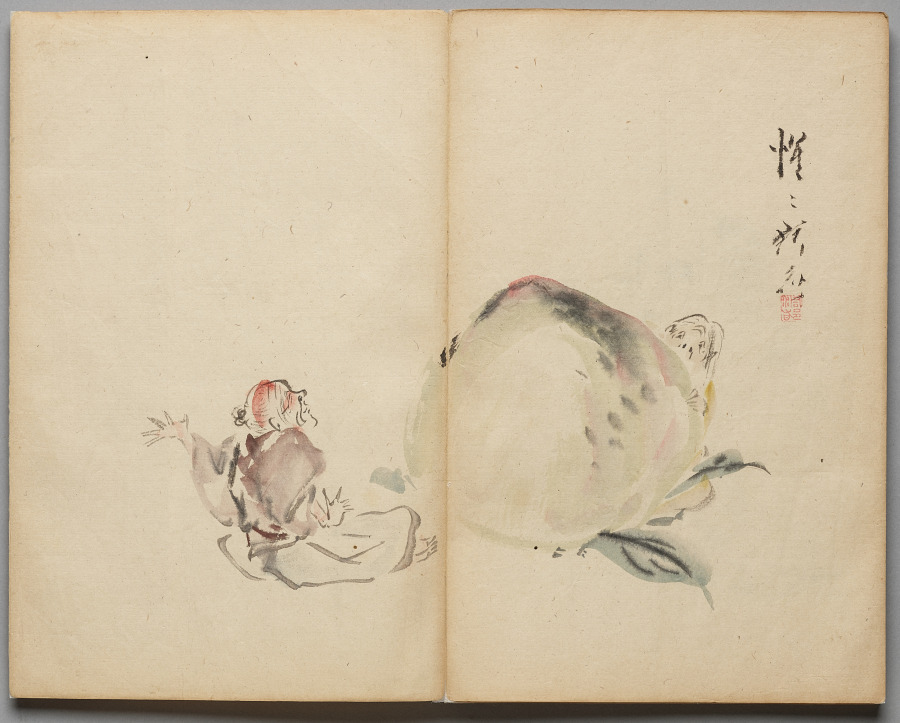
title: The Peach Boy from Sketch Album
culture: Japan, Edo period (1615–1868) to Meiji period (1868–1912)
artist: Kawanabe Kyōsai (Japanese, 1831–1889)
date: mid- late 1800s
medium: Accordion-style book of 26 double-leaves; ink and color on paper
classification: Bound Volume